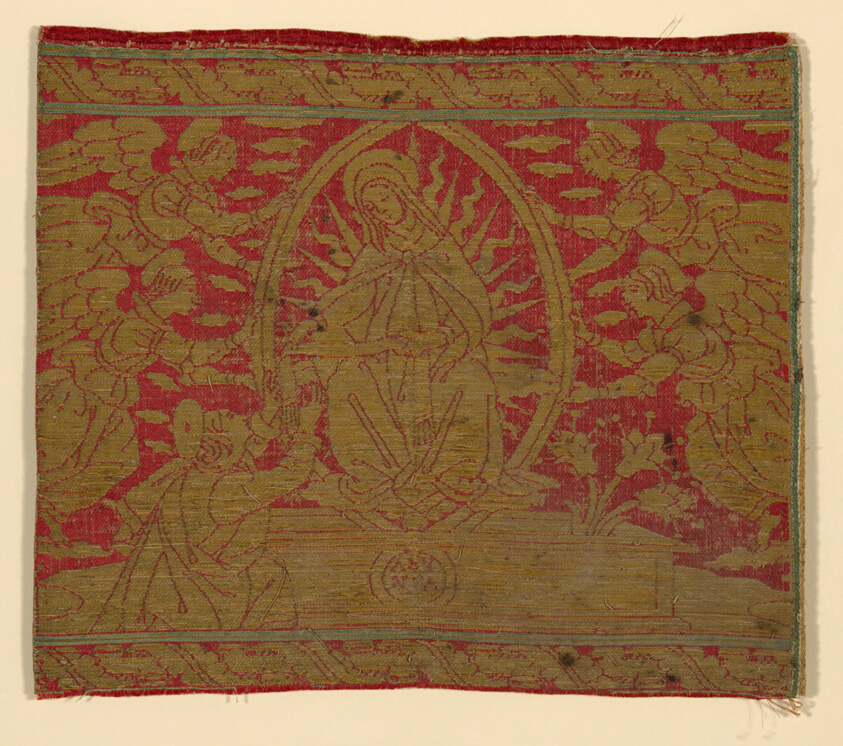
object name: Religious/Ritual Object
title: Fragment (From an Orphrey Band)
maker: Italy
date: 15th century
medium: Silk and gilt-animal-substrate-wrapped linen, warp-float faced satin weave with twill interlacings of secondary binding warps and supplementary patterning wefts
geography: Italy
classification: textile; weaving; liturgical; ritual objects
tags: Virgin Mary